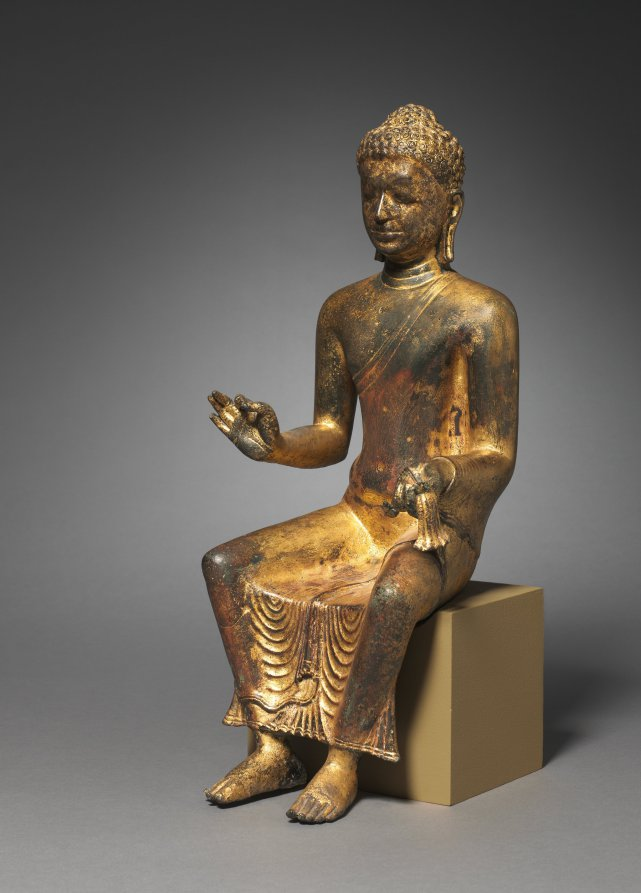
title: Enthroned Buddha Preaching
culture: Myanmar or Thailand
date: 700s–800s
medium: copper alloy with gilding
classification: Sculpture